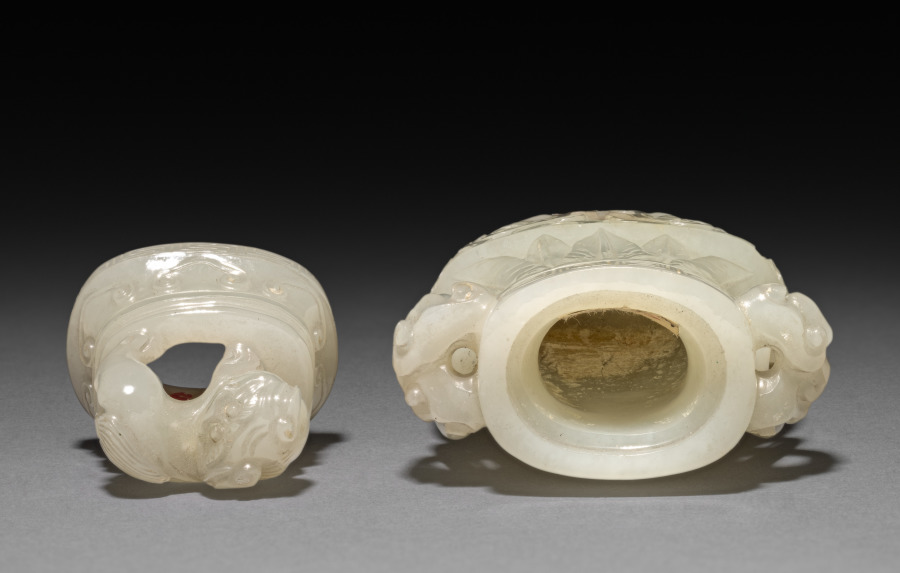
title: Jar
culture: China, Qing dynasty (1644-1911)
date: 1644–1911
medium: jade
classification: Jade